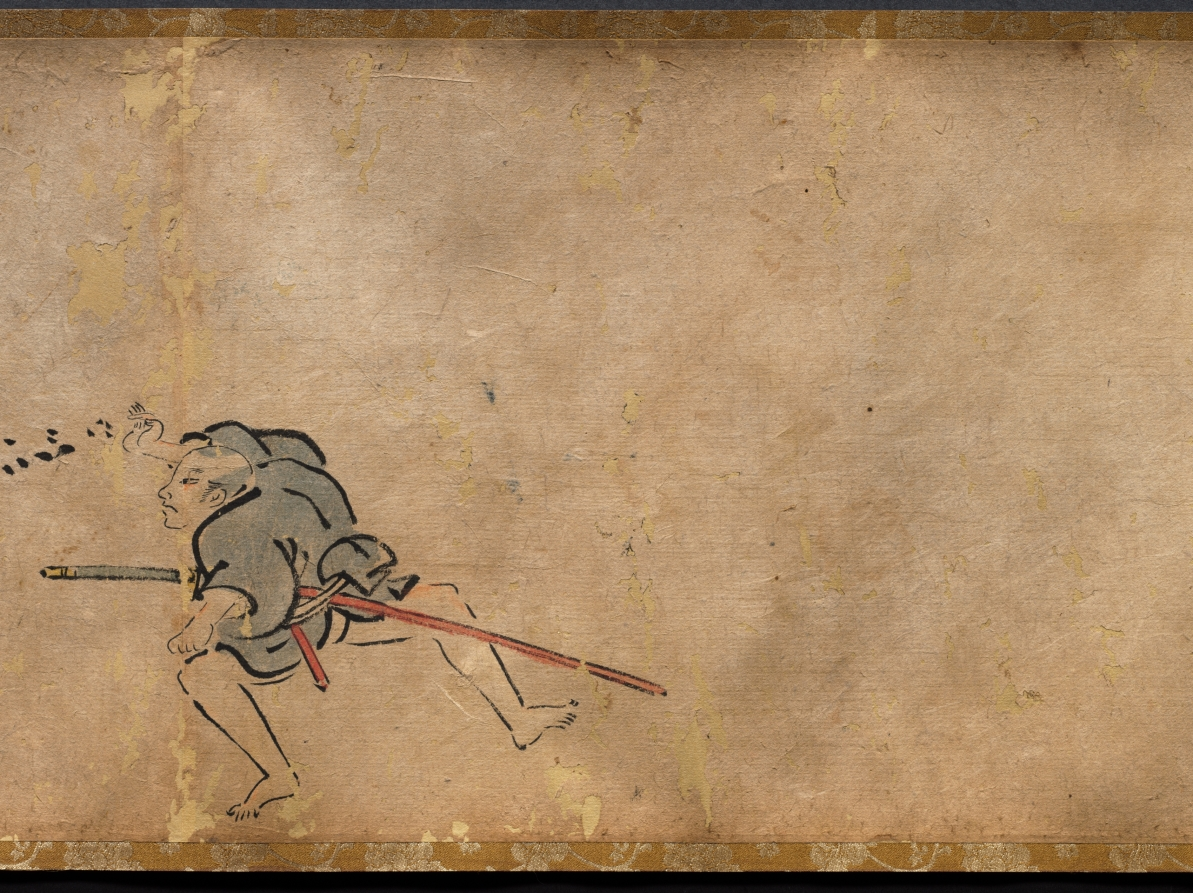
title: The Illustrated Tale of Oishi Hyōroku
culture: Japan, Edo period (1615–1868)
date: 1700s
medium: handscroll; ink and color on paper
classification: Painting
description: This incomplete handscroll illustrates part of the story of Oishi Hyoroku, a young man tasked with battling fox apparitions who were creating problems in his town. In other extant versions of the scroll, the story is set in the fall of 1624 in Kagoshima in southern Japan. Throughout the story, Hyoroku is tricked and terrified by the foxes that shift their shapes into a variety of monstrous phantoms. After repeated humiliations, he eventually captures two of the foxes. In this version, colloquial texts that function like text blurbs in comics appear throughout the scroll, but the main text is missing.